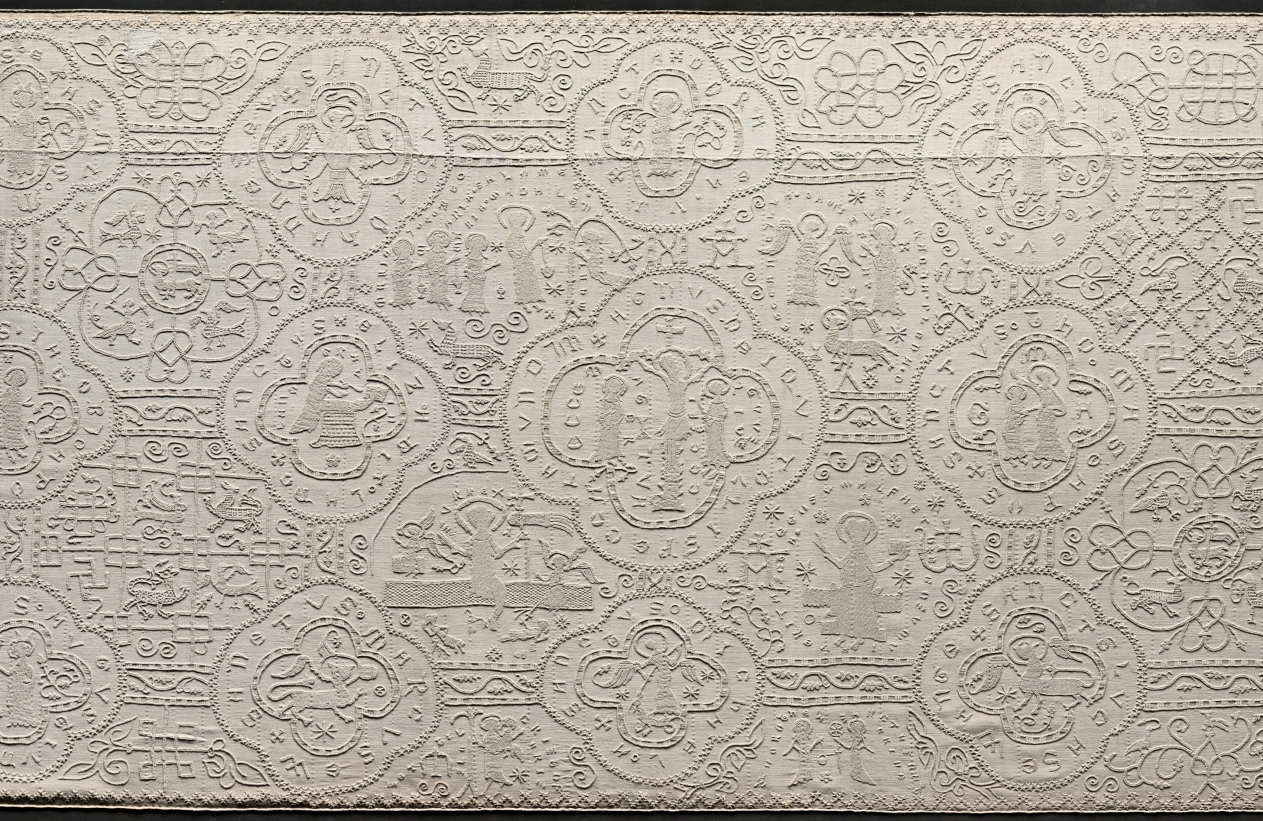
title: Altar Cloth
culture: Germany, Altenberg on the Lahn, Premonstratensian Convent, 14th century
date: c. 1350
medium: embroidery: linen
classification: Embroidery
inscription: various motifs enclosed in quatrefoils with identifying inscriptions in Gothic letters.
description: This large, embroidered altar cloth is one of the rarest, most important medieval church furnishings in existence. It was stitched by nuns in the Premonstratensian Convent in Altenberg on the Lahn River, north of Frankfurt, Germany, and was used to cover the church’s high altar in the weeks leading up to Easter. The cloth is an example of linen embroidery, a specialty of German nuns in the later Middle Ages. The Altenberg monastery church once had valuable furnishings; the high altar retable (a decorated frame with sculptures and paintings on the top of an altar) has survived, the main parts of which are now in the Städel Museum in Frankfurt, Germany.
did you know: When lit from behind, the previously hidden details emerge and the complex design becomes evident.